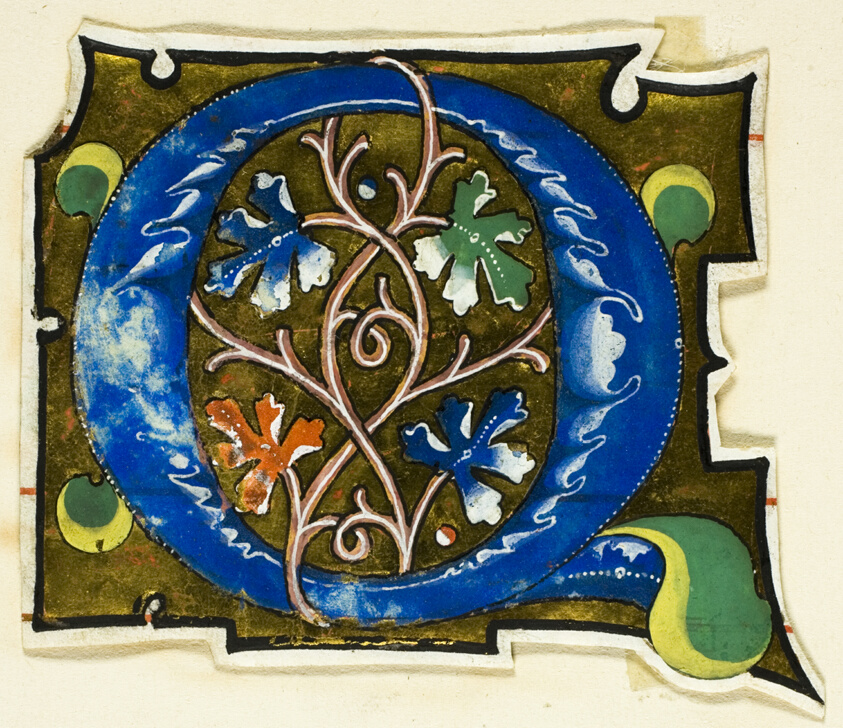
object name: Drawing and Watercolor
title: Decorated Initial "Q" in Blue with Four Oak Leaves from a Manuscript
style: medieval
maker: European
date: 14th century or modern, c. 1920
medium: Manuscript cutting in tempera and gold leaf on vellum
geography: Europe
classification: tempera; manuscript; drawings (visual works); prints and drawing